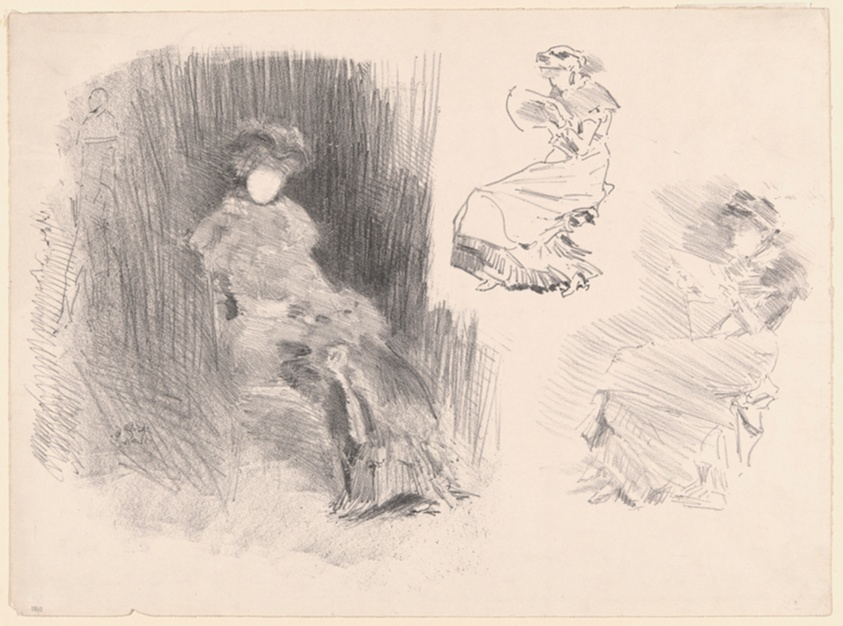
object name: Print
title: Reading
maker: James McNeill Whistler (American, 1834-1903)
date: 1879, published 1887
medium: Lithograph, in black ink, with stumping, on ivory wove paper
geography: United States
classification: lithograph; print; prints and drawing; paper